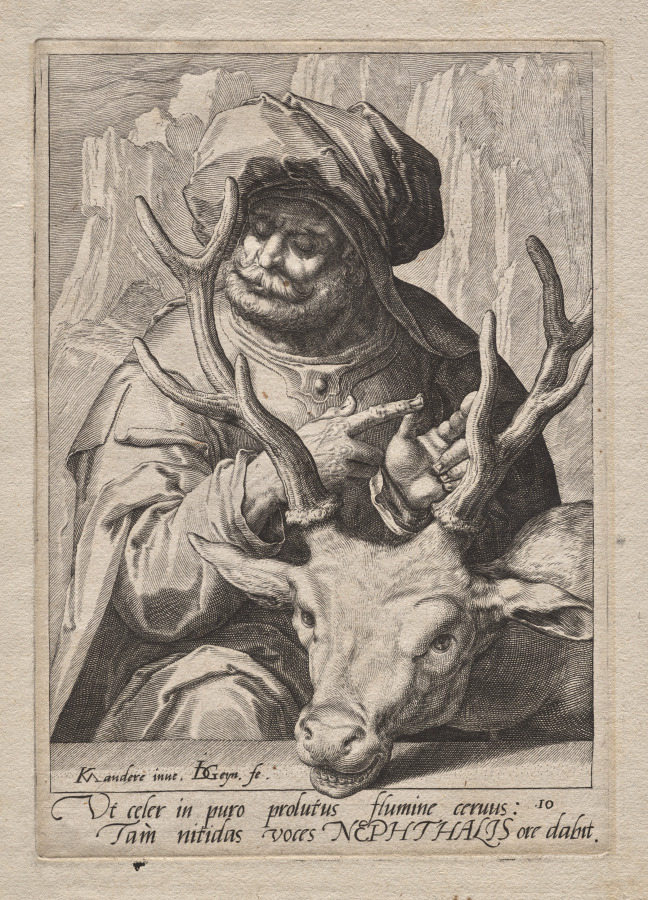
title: Plate 10: Naphtali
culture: Netherlands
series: The Twelve Sons of Jacob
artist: Jacob de Gheyn II (Netherlandish, 1565–1629)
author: after Karel I van Mander (Netherlandish, 1548–1606)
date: c. 1589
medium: engraving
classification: Print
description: In this print, biblical figure Naphtali counts with his fingers next to a stag, denoting his swiftness in battle. This is one of a series of prints depicting the twelve sons of Jacob, each with an attribute and costume that denotes his character. According to the Old Testament, Jacob blessed each of his twelve sons, prophesizing the destiny of their tribe, and assigning them a parcel of land in Canaan. The print series was made in the Netherlands in the late 16th century, a time of political struggle when Old Testament heroes were popular exemplars of fortitude and patience.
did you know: The mountain face depicted in the background of this image may refer to the tribal lands in Northern Israel granted to Naphtali by his father, Jacob, which included a mountain pass.